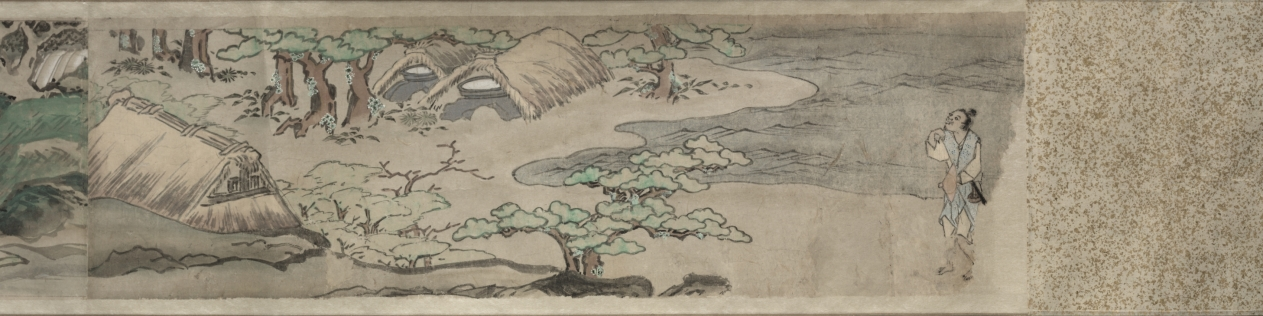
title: The Saltmaker's Story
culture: Japan, Edo period (1615–1868)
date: early 1600s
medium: One of a pair of handscrolls; ink, color, and gold on paper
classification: Painting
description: Once read and copied by girls at New Year’s celebrations and included in dowries, The Saltmaker’s Story is a rags-to-riches tale in which daughters are gifts from the gods. Despite his simple outlook, the main character progresses from humble roots as an associate at Kashima Shrine to the elite status of grandfather of the emperor through the intervention of the Kashima deity. The Saltmaker’s Story is traditionally presented in a set of three scrolls, but the text of this set has been removed by a previous owner, who remounted the illustrations as a pair. The paintings of this one take us from right to left through the first half of the tale.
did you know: This handscroll originally had texts before its paintings, but the texts were removed.